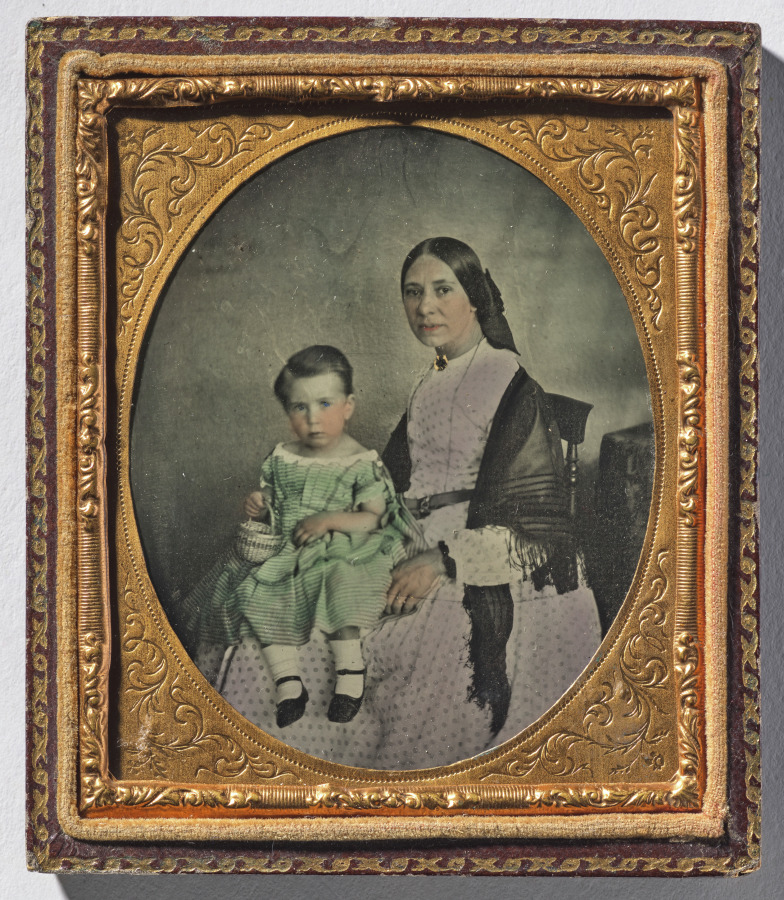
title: Mother and Child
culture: America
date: c. 1865–70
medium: ambrotype, tinted, sixth plate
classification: Photograph